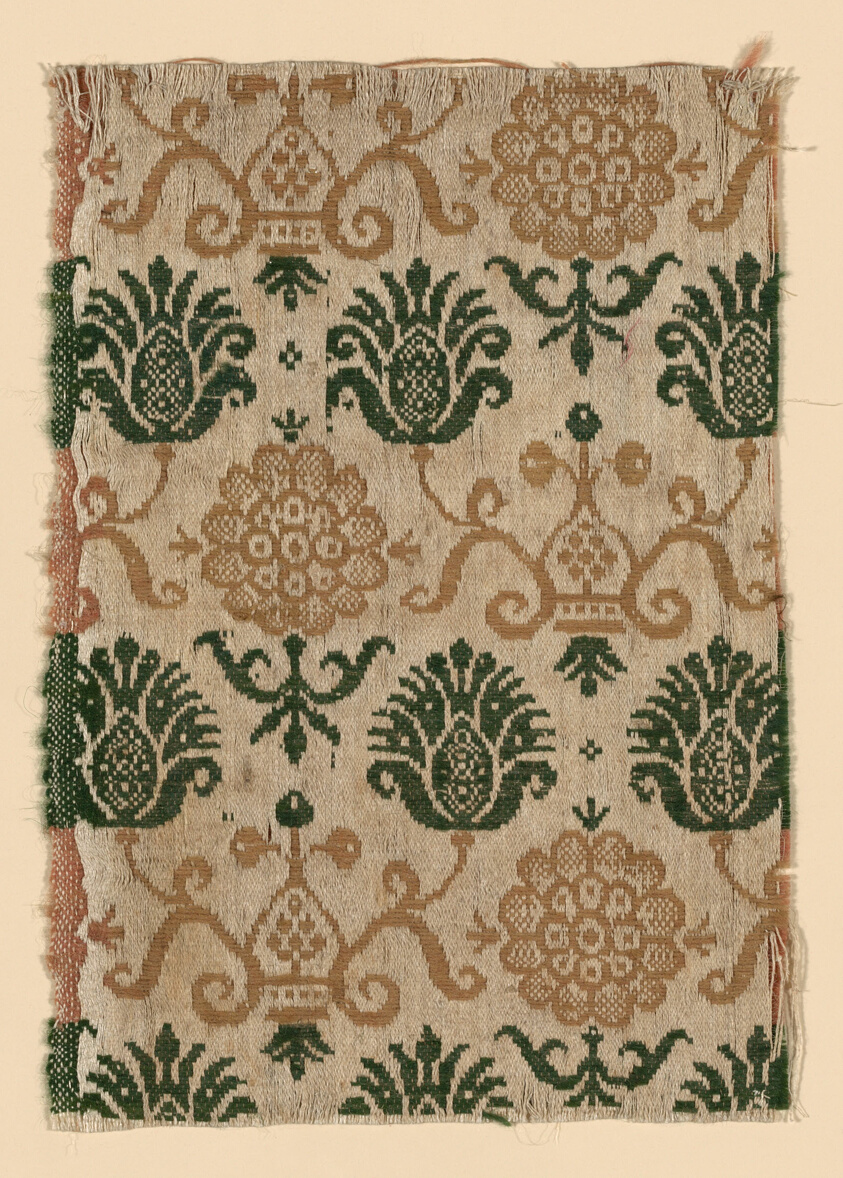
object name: Textile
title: Fragment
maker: Netherlands or North Germany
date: 17th century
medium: Linen and wool, compound weave (i.e: Beiderwand or lampas 2:1)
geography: Germany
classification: textile; weaving